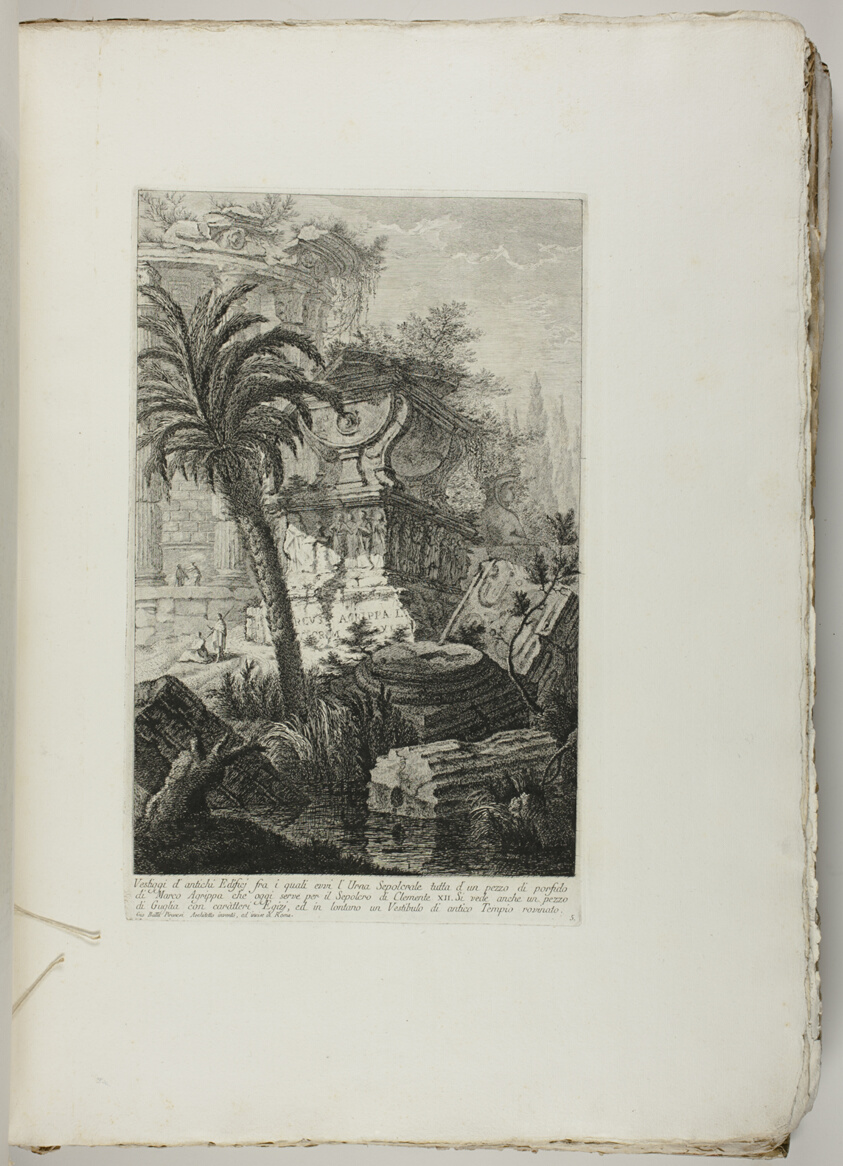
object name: Book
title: Opere Varie di Architetura; Raccolta di Alcuni Disegni del Barberi da Cento detto Il Guercino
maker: Giovanni Battista Piranesi (Italian, 1720-1778)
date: 1750-1764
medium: Book of 122 etchings on paper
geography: Italy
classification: etching; book; prints and drawing